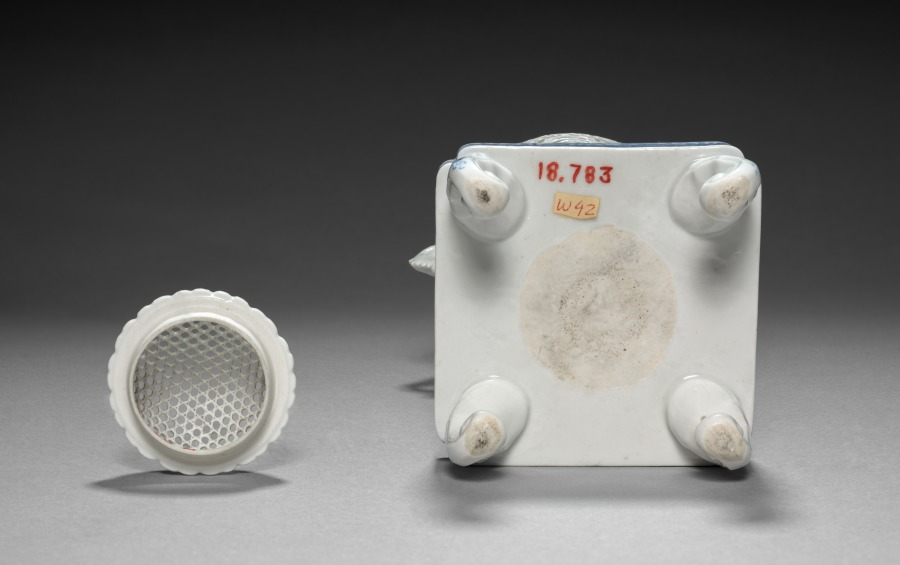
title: Chrysanthemum Censer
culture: Japan, Edo period (1615–1868)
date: 1700s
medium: Porcelain with underglaze blue (Hirado ware)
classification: Ceramic